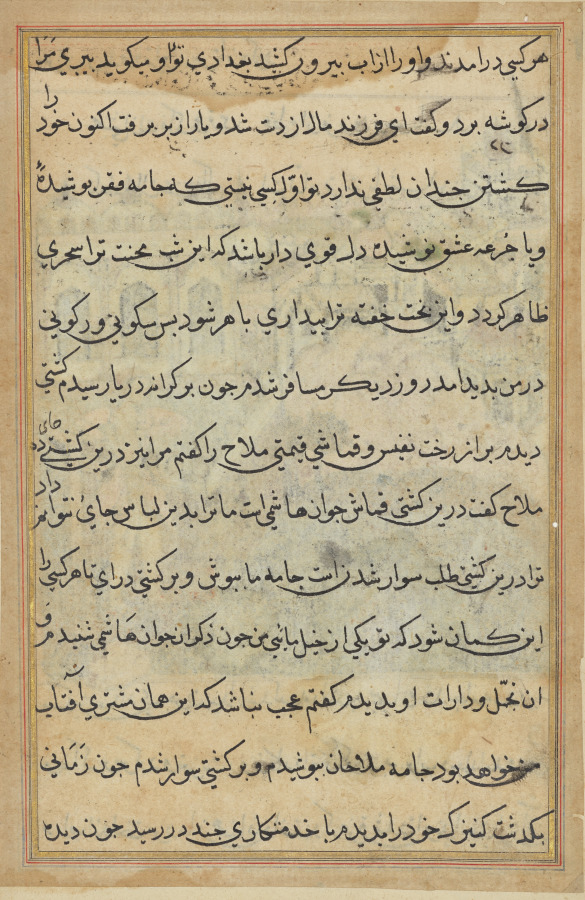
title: Page from Tales of a Parrot (Tuti-nama): text page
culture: Mughal India, court of Akbar (reigned 1556–1605)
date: c. 1560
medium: gum tempera, ink, and gold on paper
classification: Painting